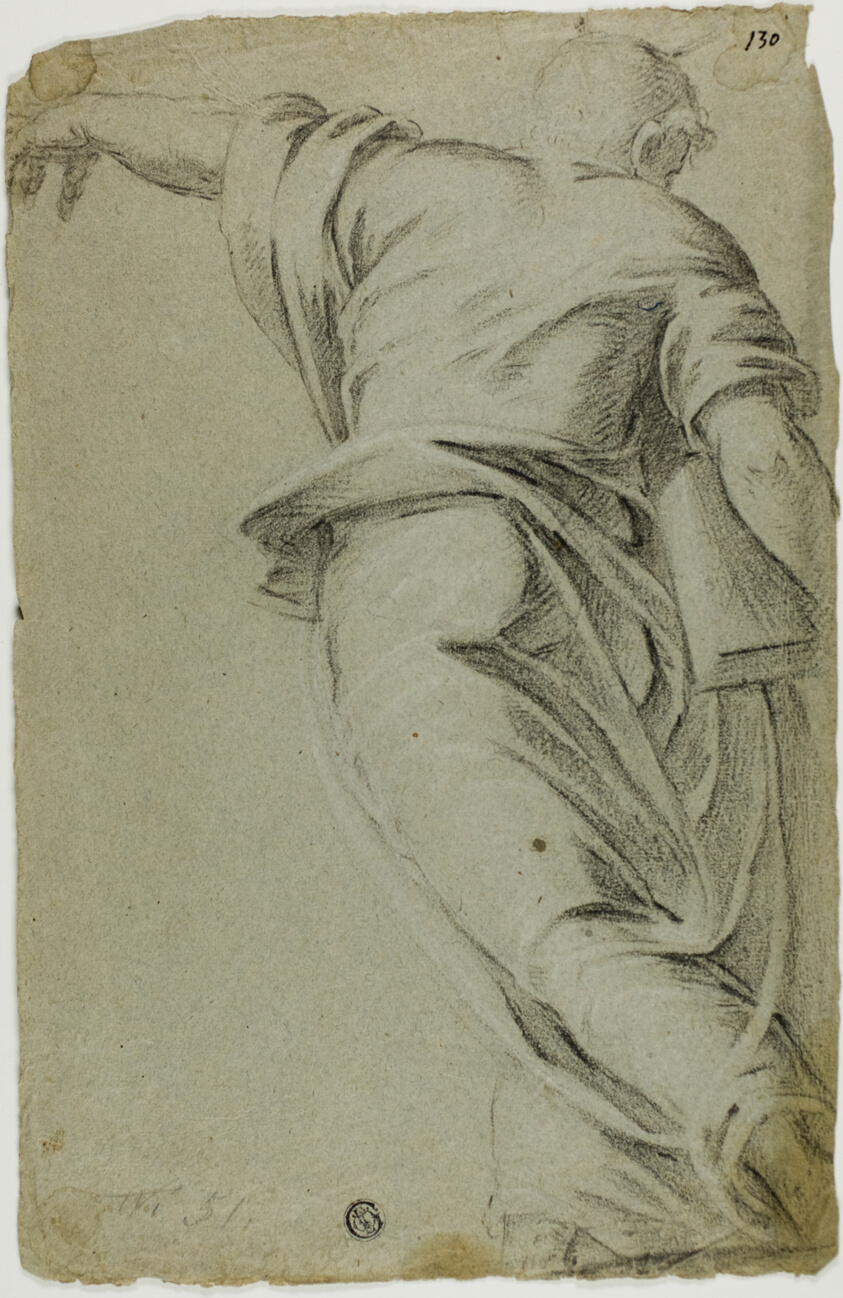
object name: Drawing and Watercolor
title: Moses Striding to the Left, Pointing with Left Hand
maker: After Jacopo Robusti, called Tintoretto; Italian, 1519-1594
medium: Black chalk, heightened with white chalk, on blue gray laid paper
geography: Italy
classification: charcoal; drawings (visual works); prints and drawing